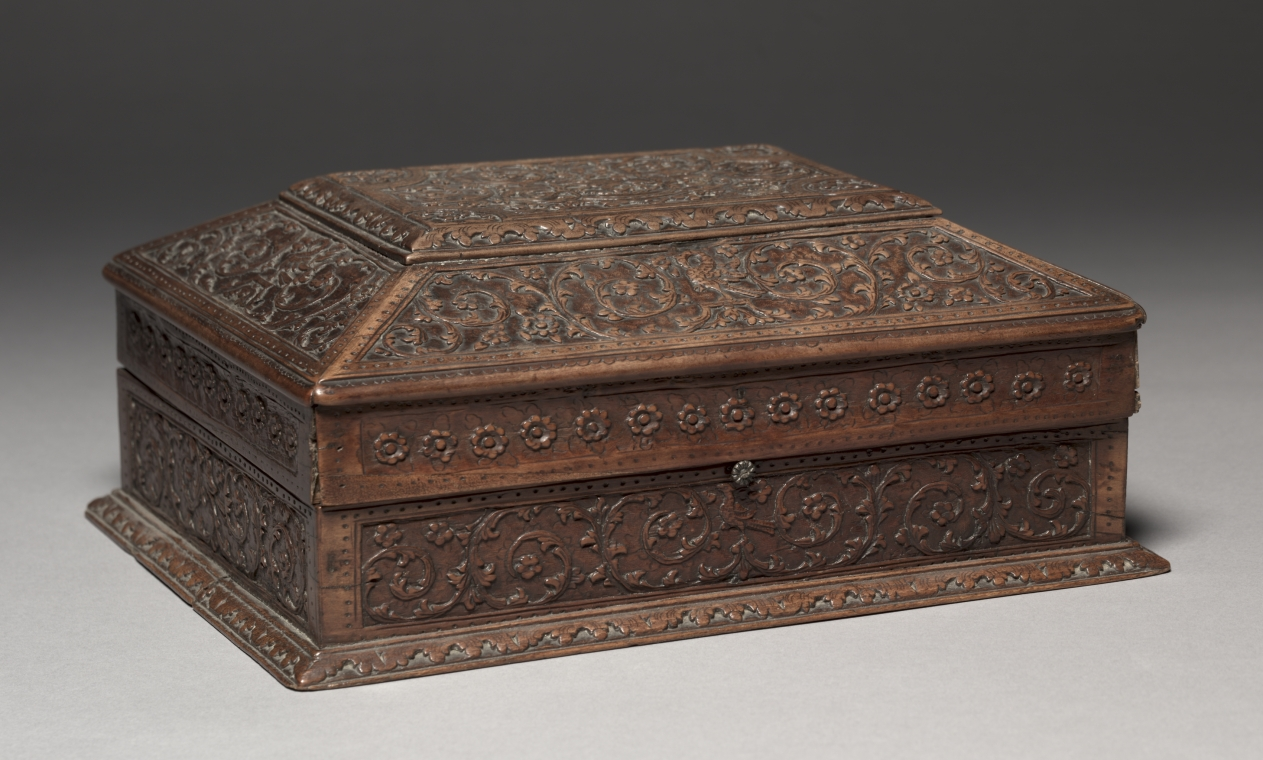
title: Box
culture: France, late 17th century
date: late 1600s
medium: wood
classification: Furniture and woodwork